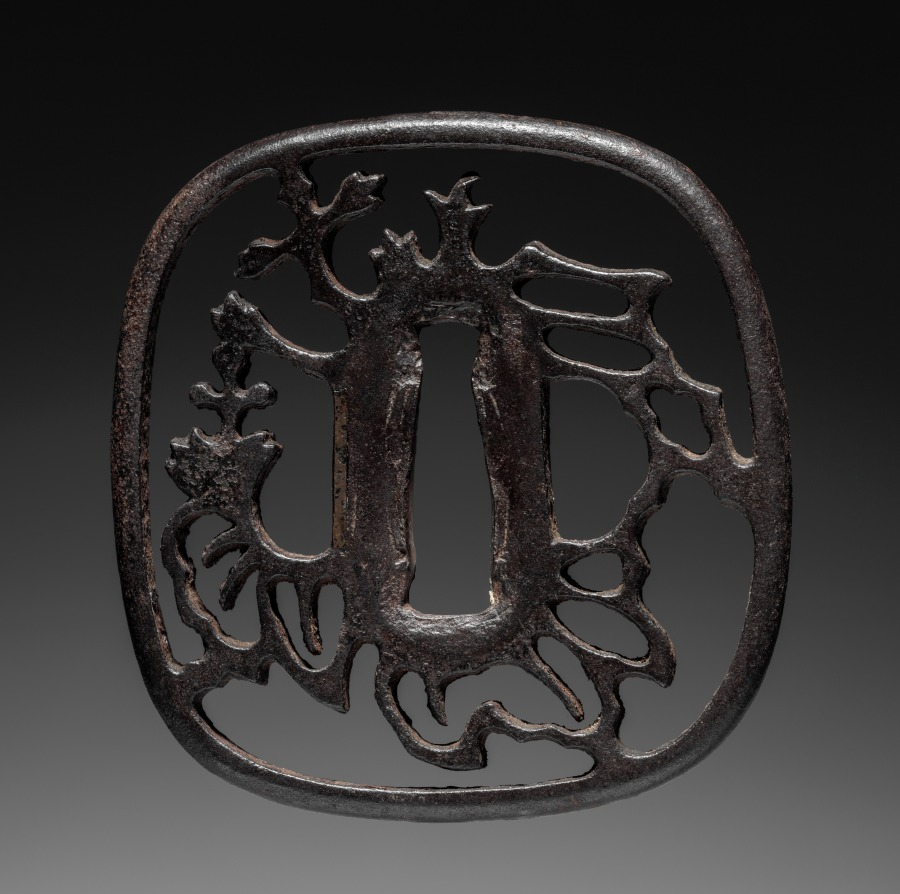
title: Sword Guard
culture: Japan, Edo period (1615–1868)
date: 1615–1868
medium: iron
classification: Arms and Armor